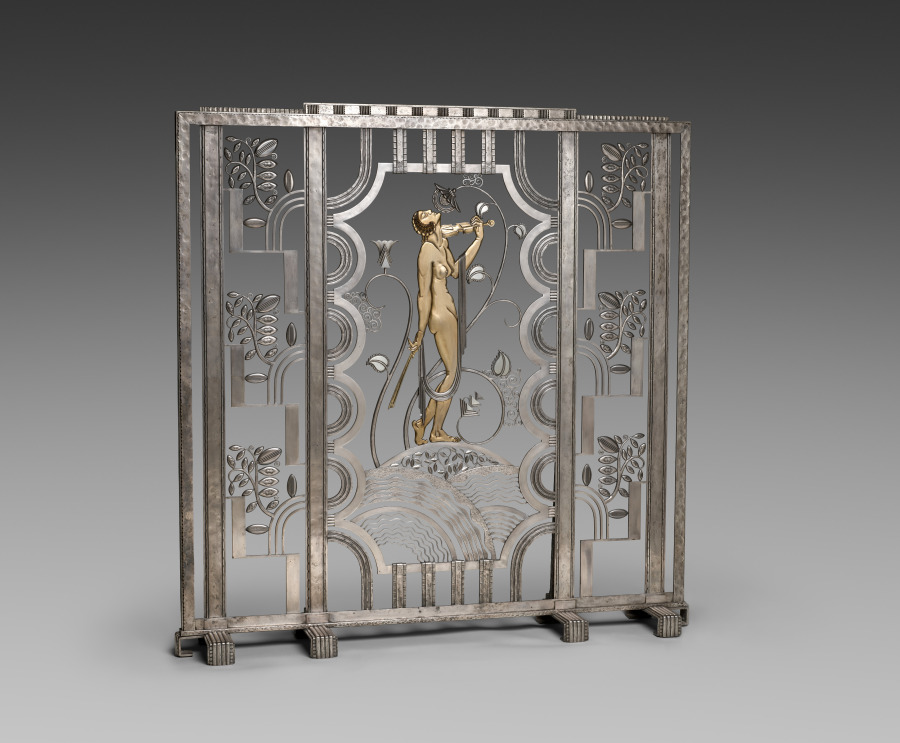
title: Muse with Violin Screen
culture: America, Ohio, Cleveland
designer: Paul Fehér (American, born Hungary, 1898–1990)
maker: Rose Iron Works (America, Ohio, Cleveland, est. 1904)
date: 1930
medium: Steel, brass; silver and gold plating, cotton velveteen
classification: Metalwork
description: Since the early years of the 20th century, the Rose Iron Works, a Cleveland supplier of architectural ornament, has produced distinguished metalwork. The company’s founder, Martin Rose, was born in Austria-Hungary and studied ornamental metalsmithing in Vienna prior to immigrating to Cleveland in 1902. In the 1920s, he hired a talented young Parisian designer, Paul Fehér, to work for the firm. Fehér’s designs, culminating in this massive screen, brought a modern European sensibility to the Rose Iron Works production. With its geometric patterning, highly stylized and abstracted natural forms, and the central figure reminiscent of the celebrated jazz singer Josephine Baker, this screen reflects the classic motifs of Art Deco design.